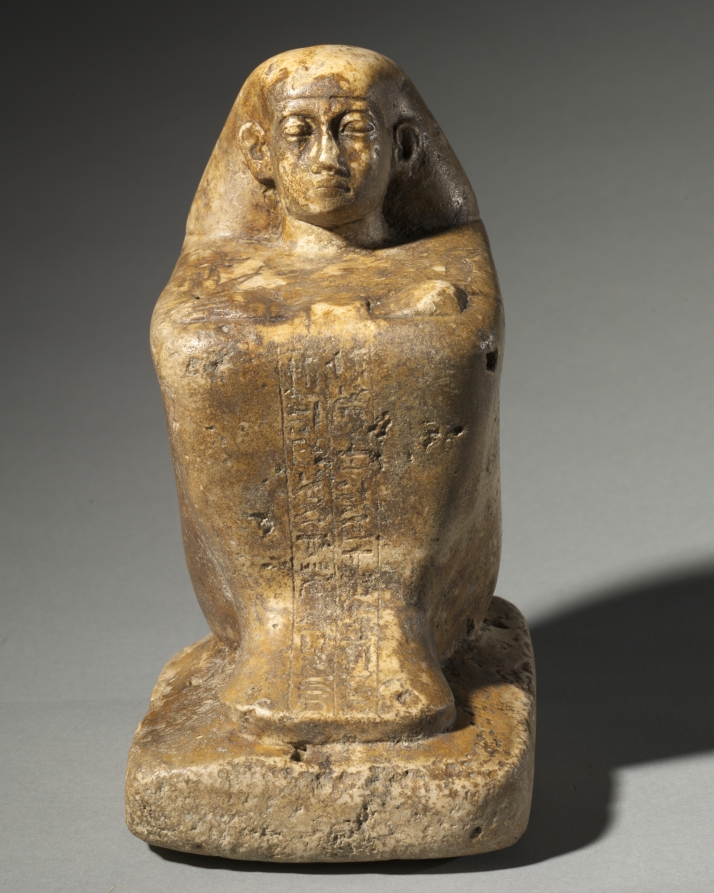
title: Block Statue of Djedbastetiufankh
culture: Egypt, Late period (715–332 BCE), Dynasties 25–26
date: c. 664–610 BCE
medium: limestone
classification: Sculpture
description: There are two basic types of Egyptian statues: tomb statues and temple statues. The Bust of Ankh-Hor and the Block Statue of Djedbastetiufankh in this case are temple statues. The compact form of the block statue appealed to Egyptian sculptors because it was virtually unbreakable. It represents the subject squatting on the ground, arms crossed over his knees. His long, enveloping mantle is contoured to his body shape, so that it resembles a cube. From the position of the arms, it is evident that the Bust of Ankh-Hor originally belonged to a striding figure holding a naos, or shrine, containing the image of a deity. His high.waisted wraparound robe, fashionable during the Persian Period (Dynasty 27) when this figure was carved, would have reached to his ankles.